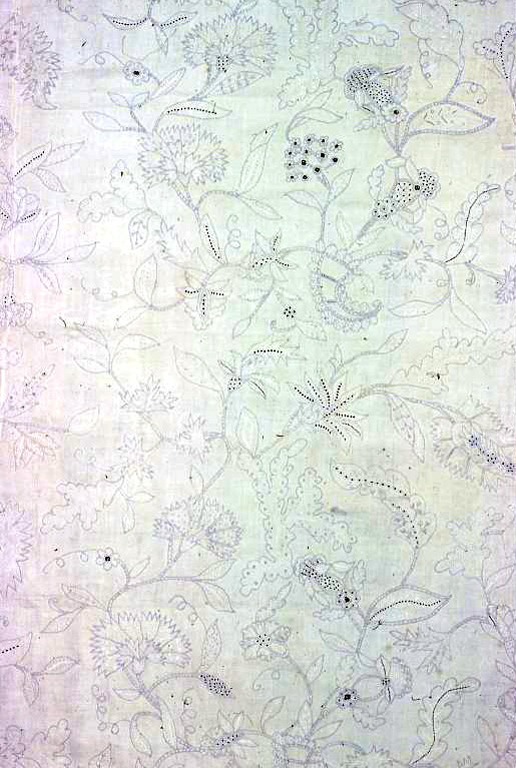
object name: Textile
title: Bedspread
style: queen anne, stuart, european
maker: England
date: Queen Anne period (1702–1714), 1701/25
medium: Linen, plain and twill weave; embroidered in linen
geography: England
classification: textile; needlework - quilt